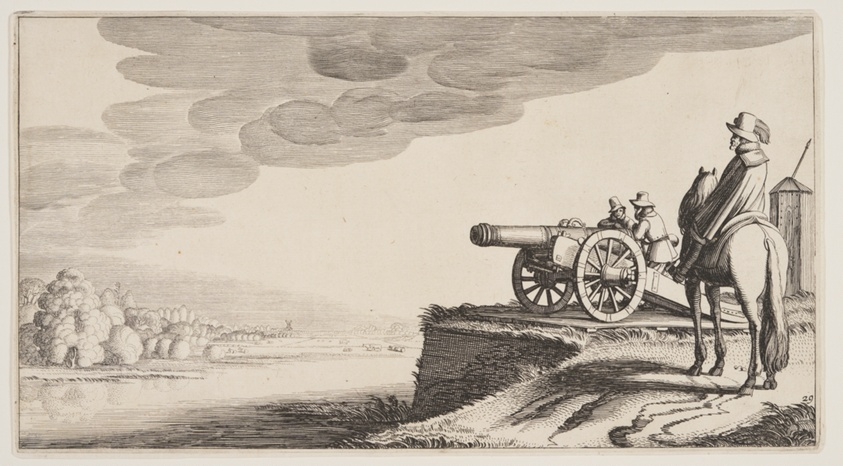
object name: Print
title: Watch-Tower on a River, from Landscapes (Playsante Lantschappen)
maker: Attributed to Claes Jansz. Visscher II (Dutch, 1586-1652); after Jan van de Velde II (Dutch, c. 1593-1641)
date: c. 1641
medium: Etching, with engraving, on ivory laid paper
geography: Netherlands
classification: etching; paper; print; prints and drawing